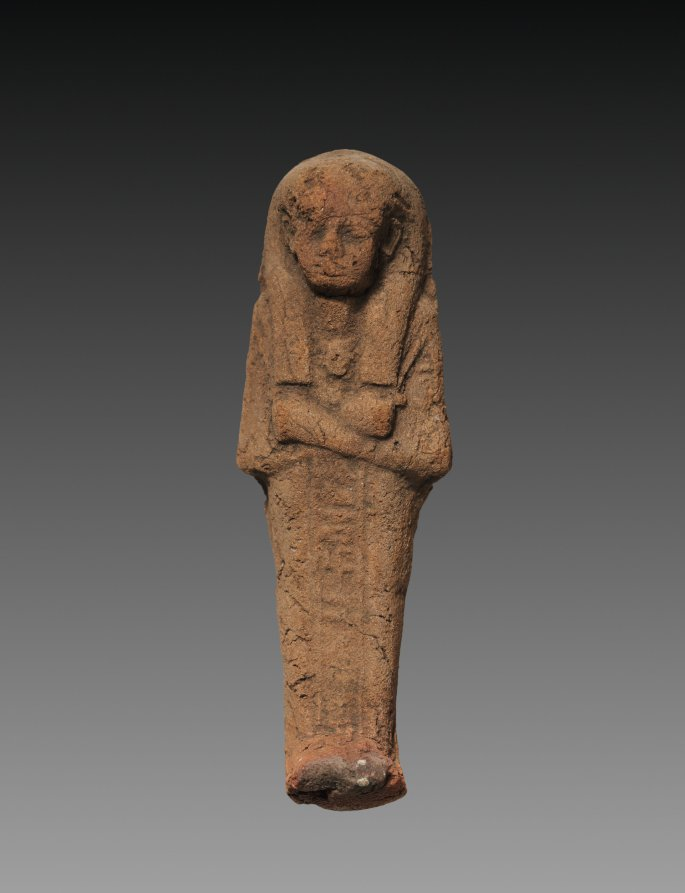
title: Shawabty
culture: Egypt, Third Intermediate (1069–715 BCE), Dynasty 21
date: 1069–845 BCE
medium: terracotta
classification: Funerary Equipment